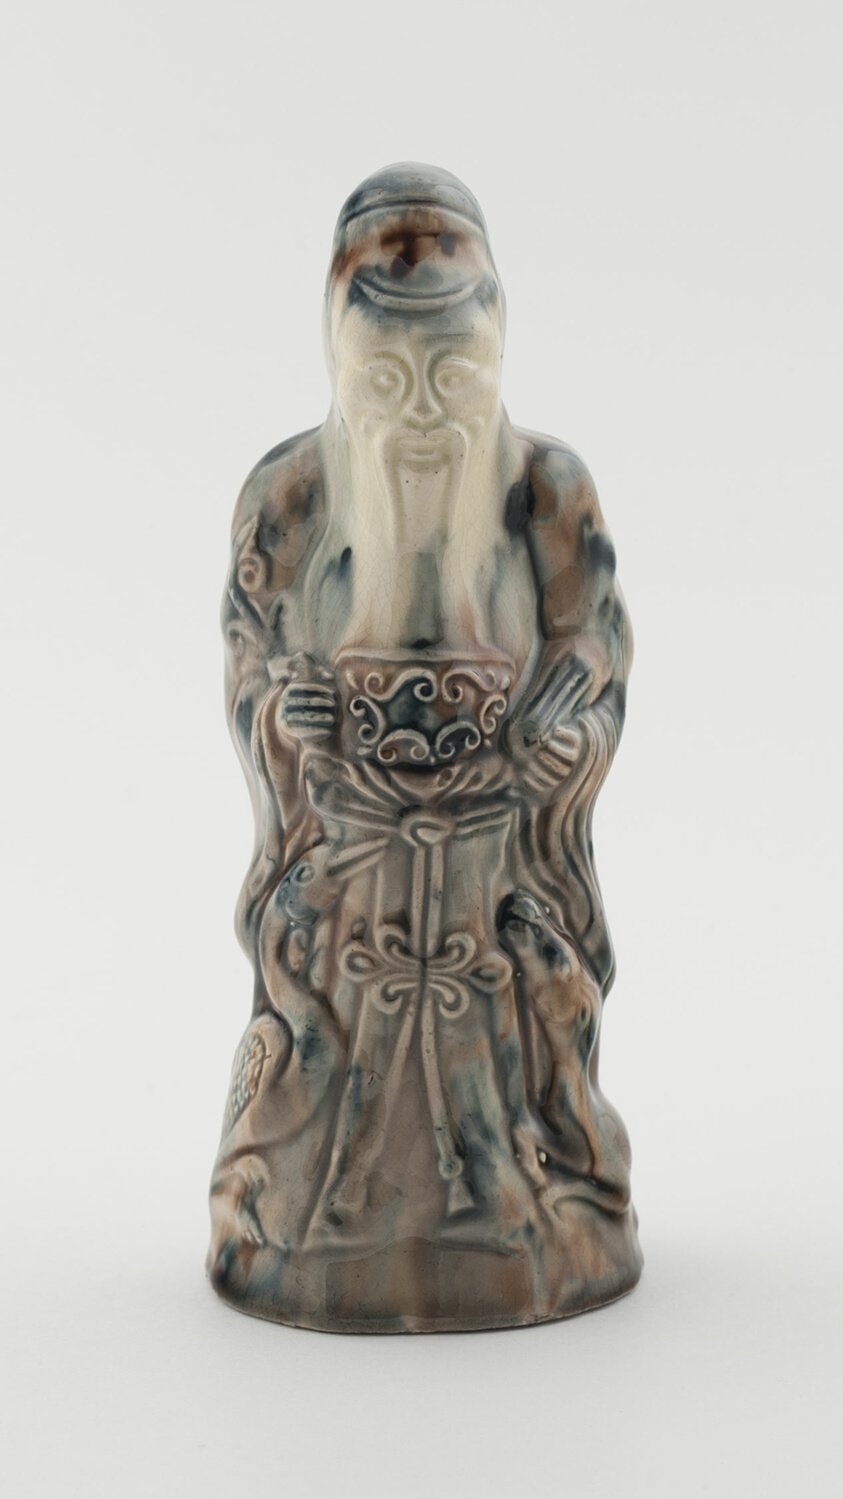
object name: Ceramics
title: Figure of Shou Lao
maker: England, Staffordshire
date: c. 1750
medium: Lead-glazed earthenware with polychrome decoration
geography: Staffordshire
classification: ceramics; european decorative arts